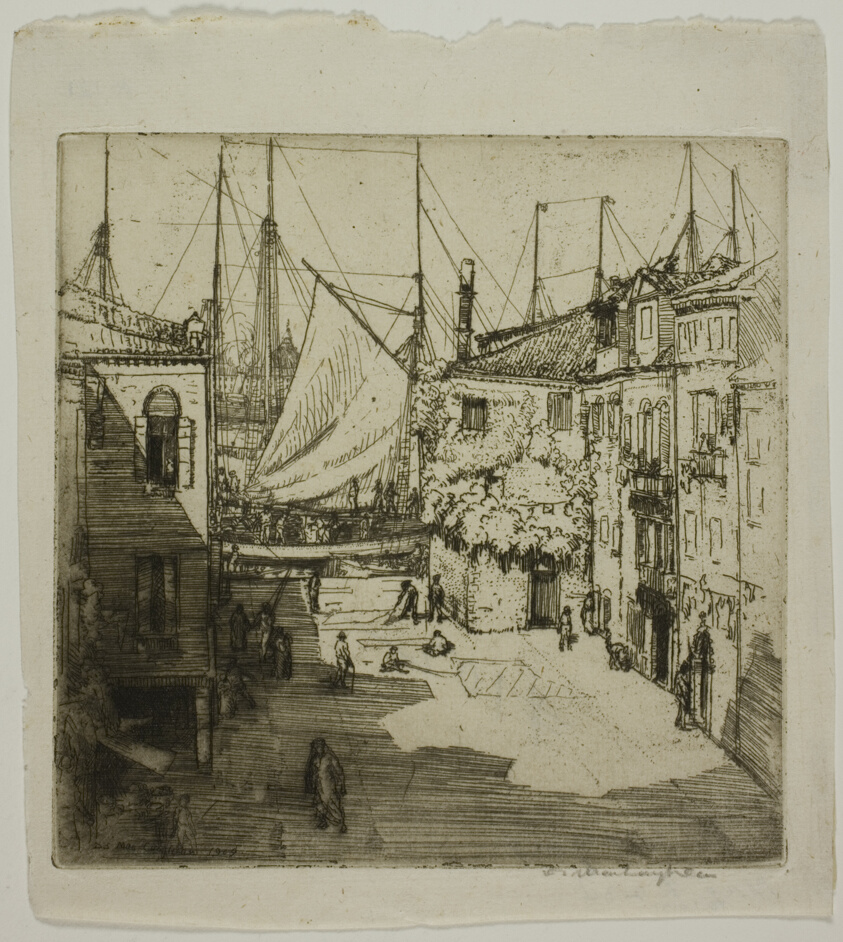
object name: Print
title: Sail Yard, Venice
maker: Donald Shaw MacLaughlan (American, born Canada, 1876-1938)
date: 1909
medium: Etching in black on white laid paper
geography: United States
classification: etching; print; prints and drawing